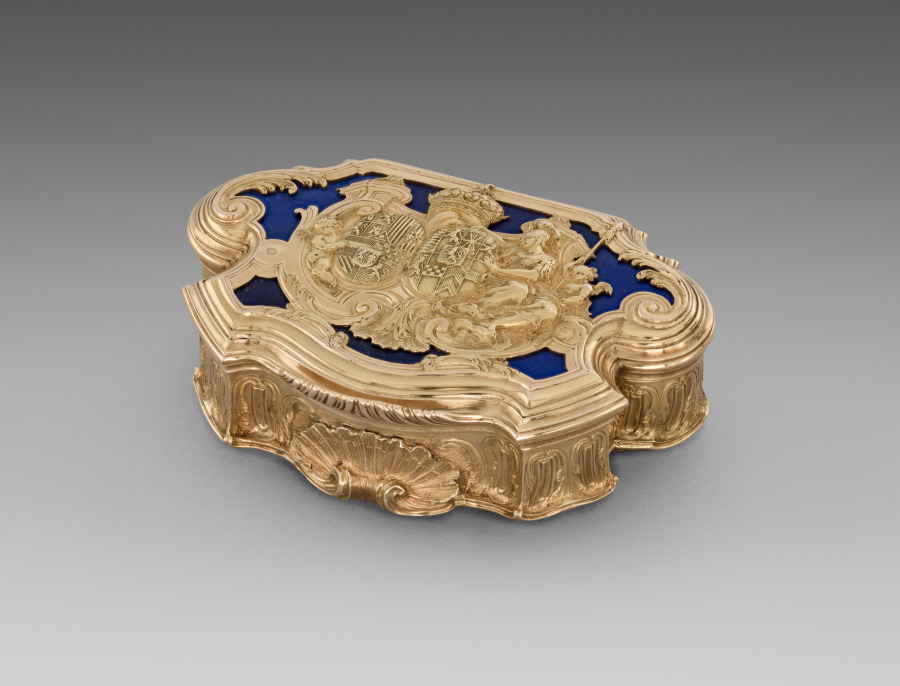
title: Gold Box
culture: France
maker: Juste-Aurèle Meissonnier (French, 1695–1750)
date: 1728–29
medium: gold and lapis lazuli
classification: Metalwork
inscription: IOM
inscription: a crowned M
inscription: a crowned dolphin's head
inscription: a crowned chancellor's mace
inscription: double frame eagle's head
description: With its central cartouche, heavy molding, and fluted sides, the design of this box attests to Juste-Aurèle Meissonnier’s interest in architecture. The box is further distinguished by a strong sense of movement, achieved through its dynamic contour, extraordinary level of detail, and the dramatic contrast between gold and lapis lazuli. Such small boxes, known as snuffboxes, were used to hold scented powdered tobacco that was inhaled through the nostrils. Made of precious materials and highly ornamented, they conveyed the owner’s wealth, fashion awareness, sophistication, and social standing. These personal, collectible items were often presented as luxurious gifts. This box was made for the dowager Queen of Spain, Maria Anna of Neuburg, whose coat of arms – along with that of her late husband, Charles II – features on the cover.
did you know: This is one of the two known objects that bear the maker's mark of Meissonnier.